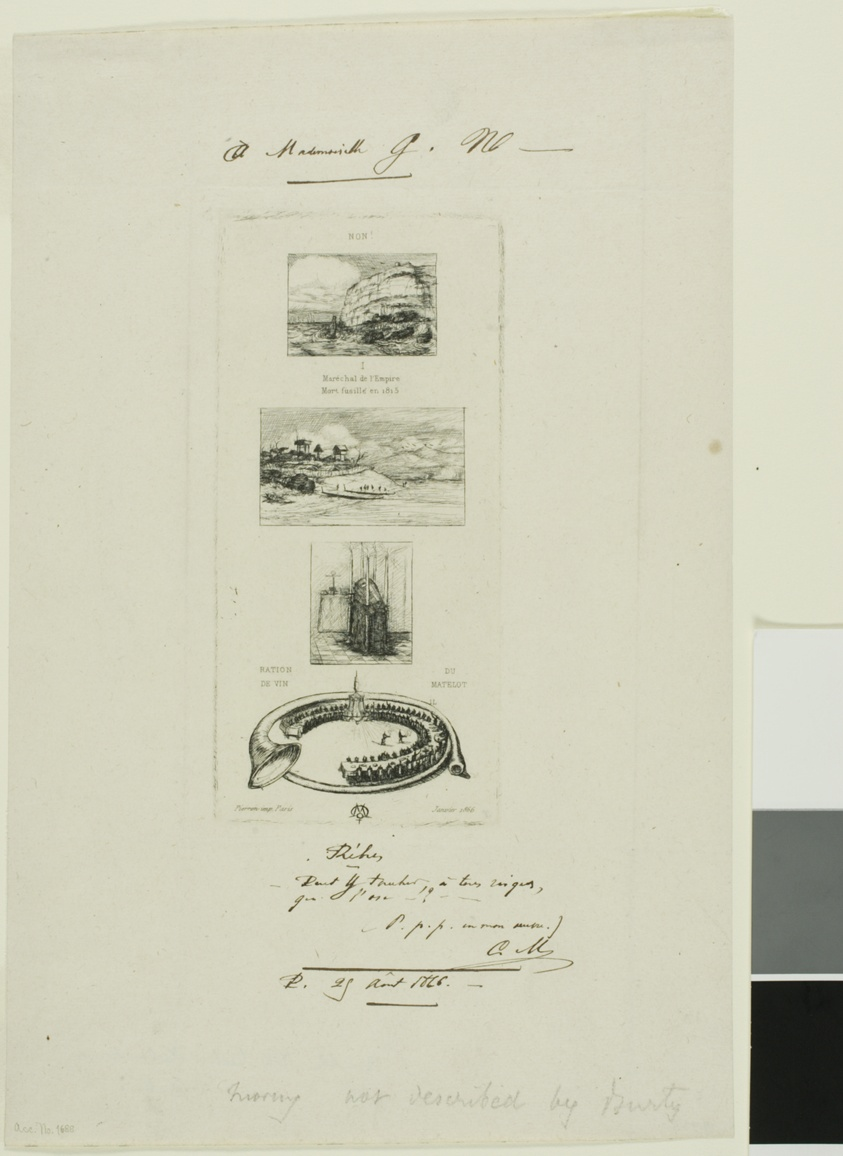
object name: Print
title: Rebus: 'No, Morny is not dead for he is marrying again'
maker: Charles Meryon (French, 1821-1868); printed by Pierron (French, 19th century)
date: January 1866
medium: Etching on ivory laid paper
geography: France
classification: etching; print; prints and drawing